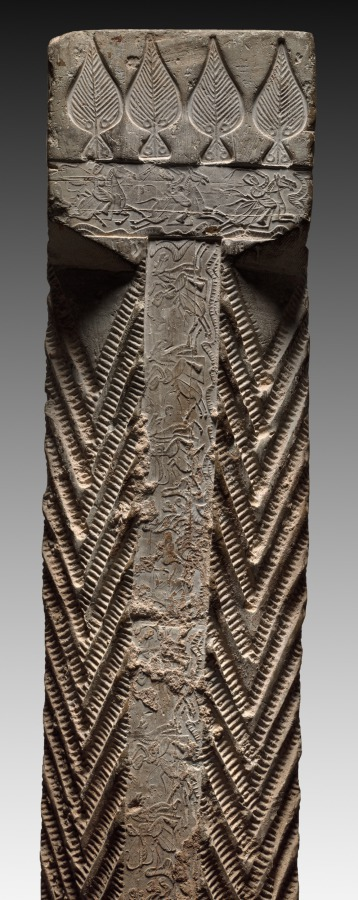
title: Hollow Tile: Column from Tomb-Chamber Doorway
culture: China, Han dynasty (202 BCE–220 CE)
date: 100–200 CE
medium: earthenware, die-stamped relief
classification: Ceramic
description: Striding tigers (top), racing horsemen (right column), and reverent officials (left column) are stamped into the surface of this underground portal to a tomb. The doorway preserves in stone the post-and-lintel structure, a basic element of Chinese wooden architecture. By the first century CE, a revolution in Chinese tomb construction and furnishing had taken place. Tombs lined with decorated bricks and tiles replace the earlier tombs constructed with only rammed-earth walls. Ceramic surrogates or models of stoves, houses, servants, and pets filled these more durable chambers, symbolically extending the creature comforts of this world into the world after death.